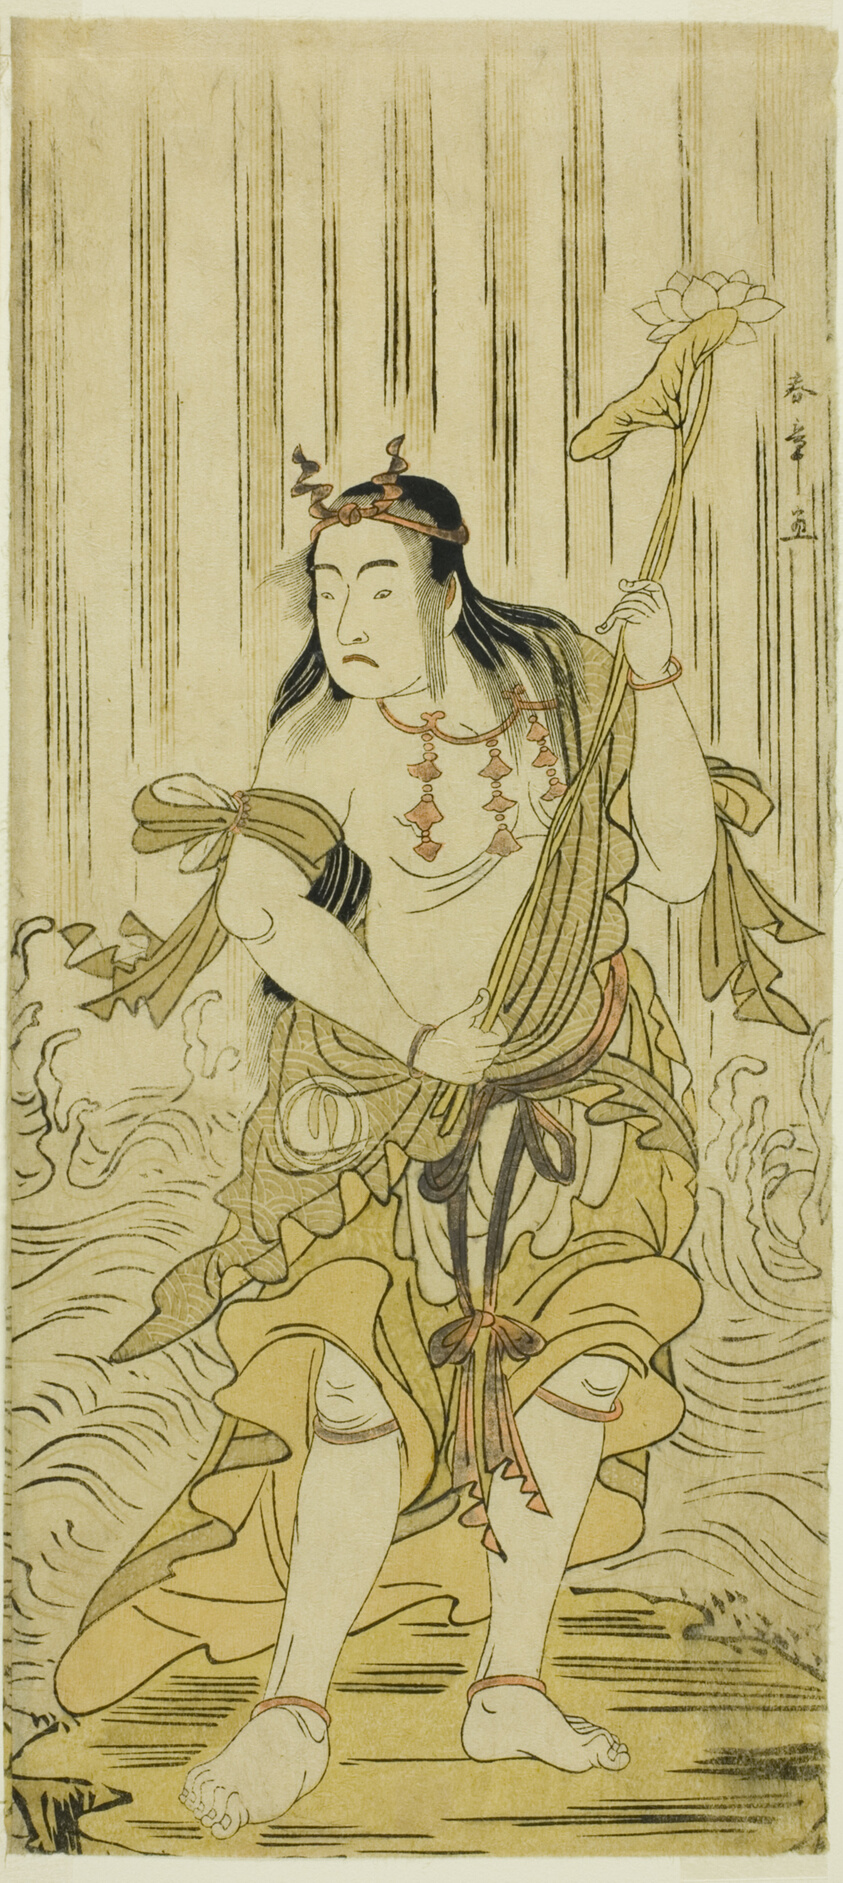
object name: Print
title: The Actor Sawamura Sojuro III as Kongara Doji in the Play Kitekaeru Nishiki no Wakayaka, Performed at the Nakamura Theater in the Eleventh Month, 1780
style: Japanese (culture or style)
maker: Katsukawa Shunsho 勝川 春章; Japanese, 1726-1792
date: c. 1780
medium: Color woodblock print; hosoban; right sheet of diptych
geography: Japan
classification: woodblock print; print; asian art